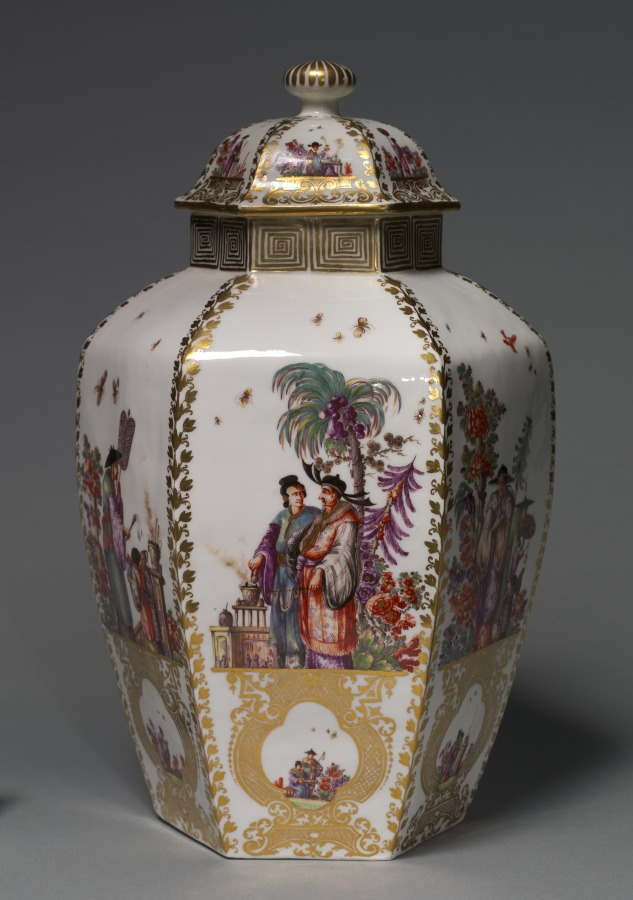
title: Covered Vase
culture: Germany, Meissen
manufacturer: Meissen Porcelain Factory (German, est. c. 1710)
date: c. 1728–30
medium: porcelain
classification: Ceramic